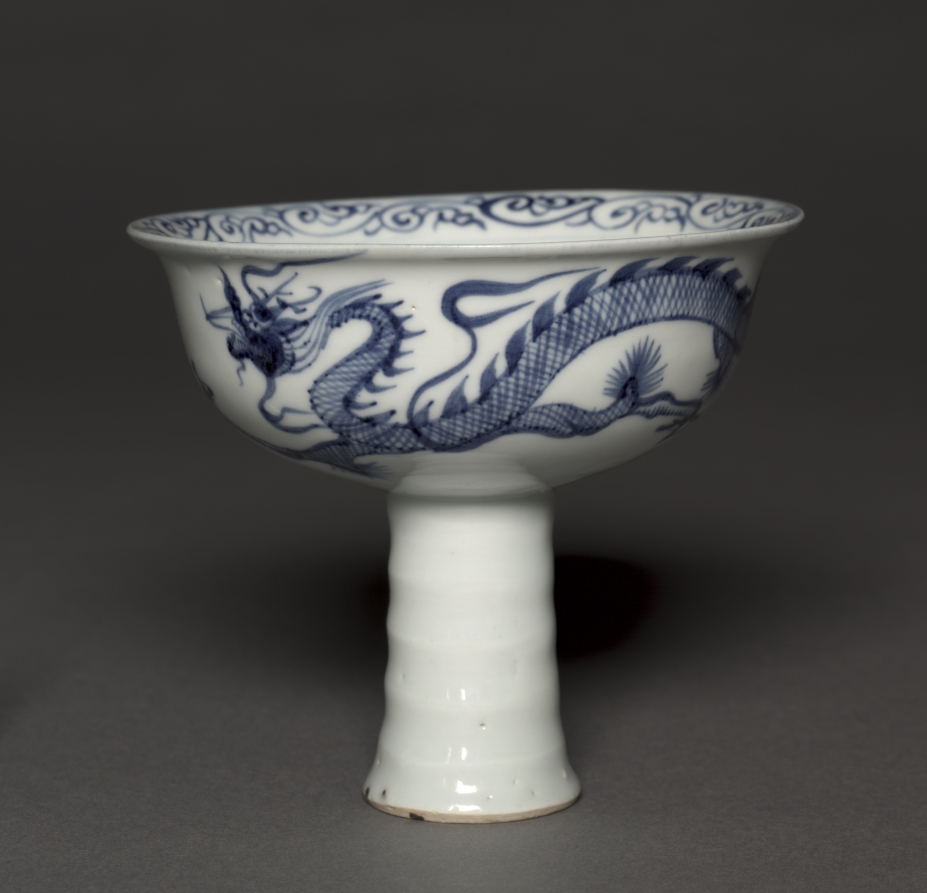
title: Stem Cup with Dragon Pursuing Flaming Jewel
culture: China, Jiangxi Province, Jingdezhen kilns, Yuan dynasty (1271–1368)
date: 1300s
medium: porcelain with underglaze cobalt blue and molded decoration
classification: Ceramic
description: The stem cup as a porcelain vessel shape was introduced to China by the Mongols from Northeast Asia when they ruled the country in the 14th century.